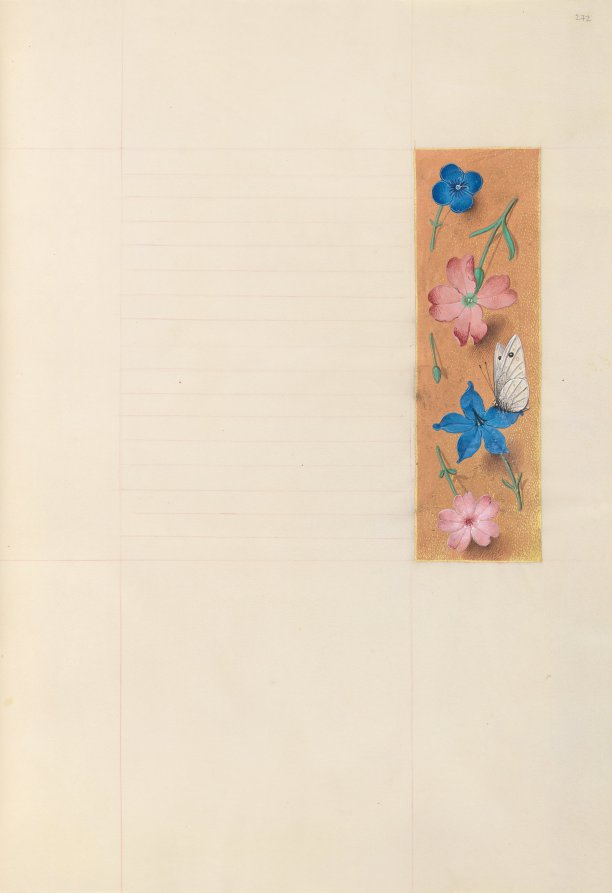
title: Hours of Queen Isabella the Catholic, Queen of Spain: Fol. 272r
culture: Flanders, Ghent and Bruges, late 15th century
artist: Master of the First Prayerbook of Maximillian (Flemish, c. 1444–1519)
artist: and Associates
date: c. 1500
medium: ink, tempera, and gold on vellum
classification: Bound Volume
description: This manuscript was illuminated by a circle of at least five highly organized manuscript painters active in the Flemish cities of Ghent and Bruges. The principal illuminator was Alexander Bening, who painted the majority of the book's miniatures. Manuscripts produced by this circle of artists are renowned for the decoration of their borders, which typically feature a rich variety of realistically-painted flowers, birds, and butterflies. This prayer book, called a book of hours, was intended not for a cleric, but for the private devotions of a lay person-in this case, Isabella the Catholic, Queen of Spain (1451-1504). Isabella's coat of arms embellishes the book's frontispiece. It is unlikely that the book was commissioned by the Queen herself; rather, she probably received it as a diplomatic gift from someone courting her patronage, perhaps Cardinal Francisco Jimenez de Cisneros. A Franciscan friar, Jimenez was dependent upon Isabella for his advancement, first to the post of Queen's confessor in 1492, and then to Archbishop of Toledo in 1495.